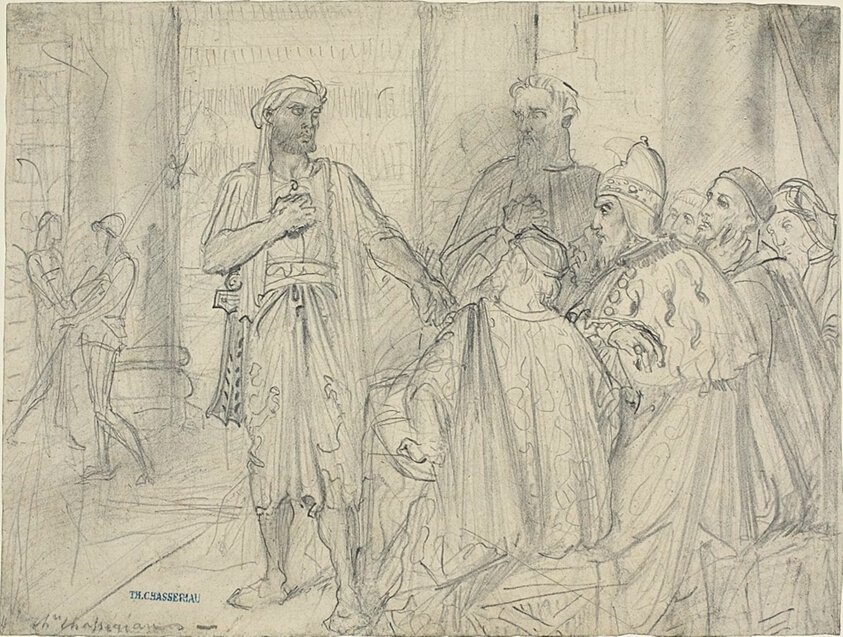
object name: Drawing and Watercolor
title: Othello's Speech to the Senators of Venice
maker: Théodore Chassériau (French, 1819-1856)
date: c. 1844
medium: Graphite on ivory wove paper, permeter mounted on cream laid paper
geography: France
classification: graphite; drawings (visual works); prints and drawing